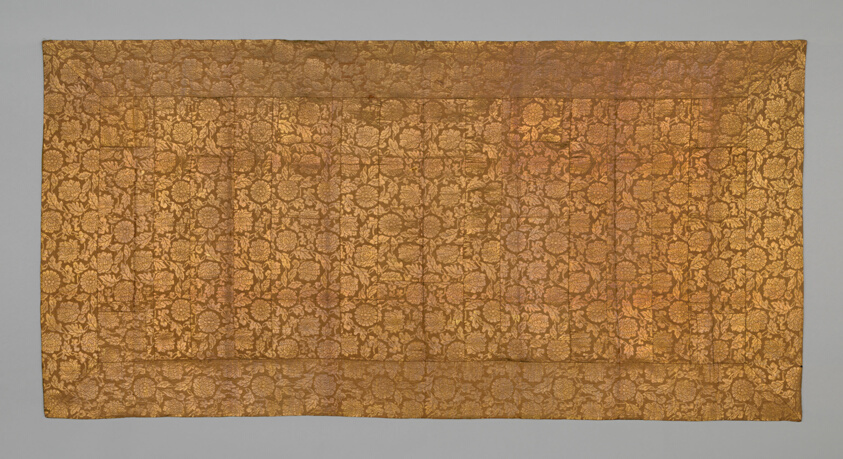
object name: Textile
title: Kesa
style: meiji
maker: Japan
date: late Edo period (1789–1868)/ Meiji period (1868–1912), late 18th/ early 19th century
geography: Japan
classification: textile; weaving; liturgical - buddhist